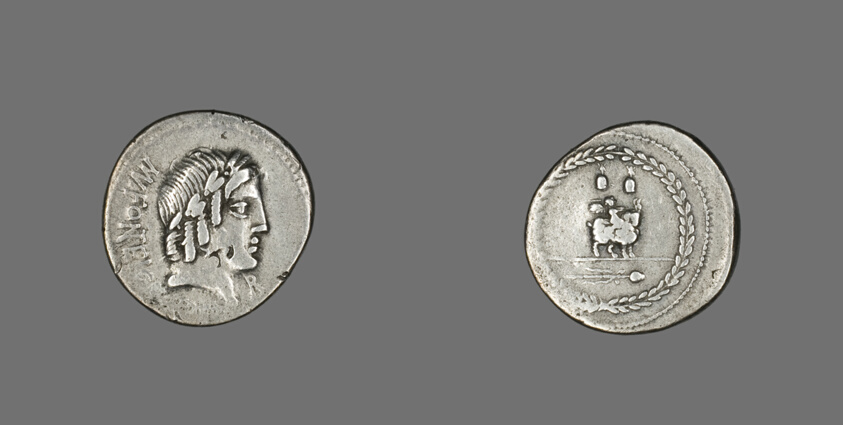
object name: Coin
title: Denarius (Coin) Depicting the God Apollo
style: republic period, ancient, roman (ancient, style or period)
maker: Roman, minted in Rome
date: 85 BCE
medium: Silver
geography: Italy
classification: coin; ancient art; struck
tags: gods (deities)